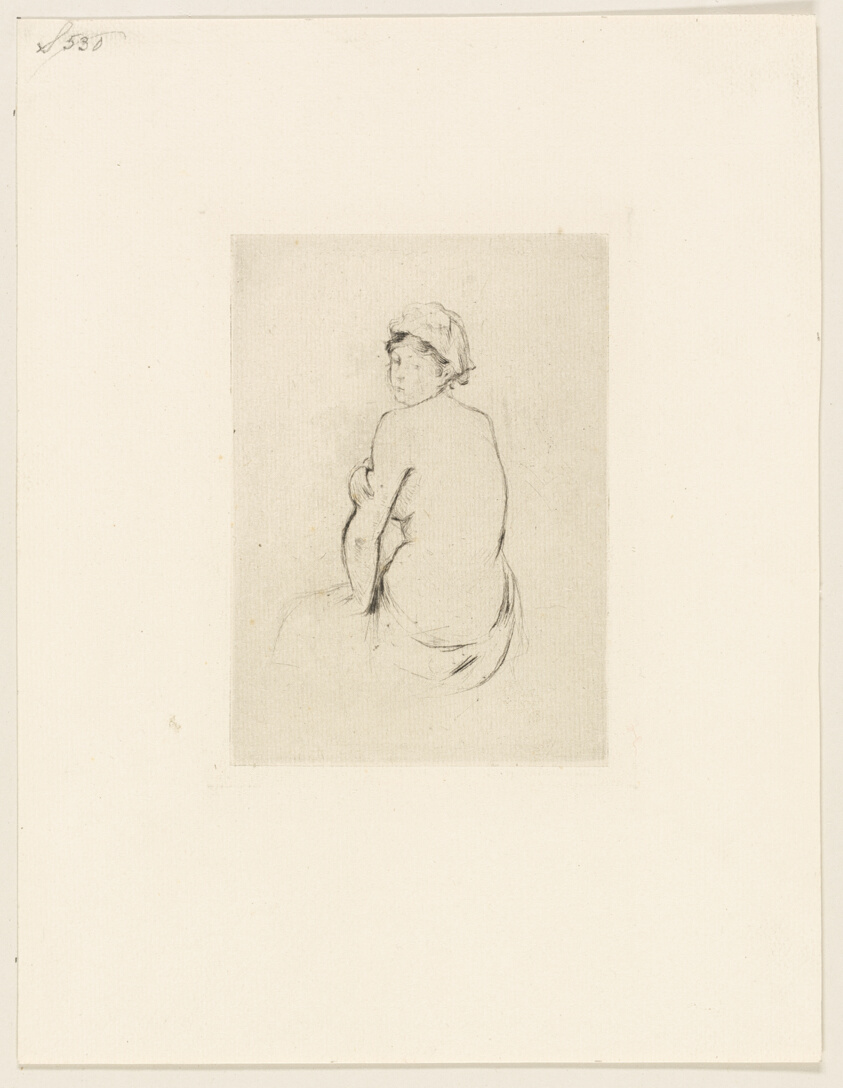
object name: Print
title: Nude Seen from Behind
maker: Berthe Morisot (French, 1841-1895); printed by Ernest Rouart (French, 1874-1942)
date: 1889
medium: Drypoint on cream laid paper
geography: France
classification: drypoint; print; prints and drawing